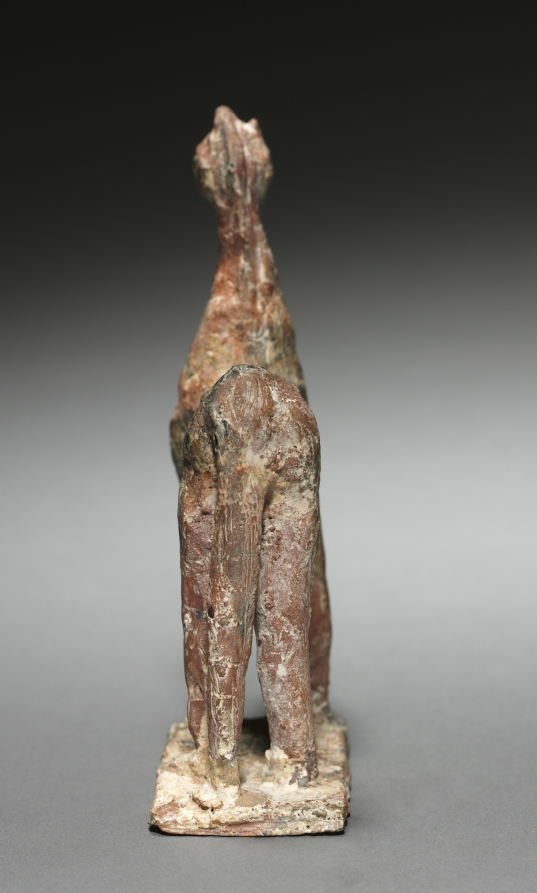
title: Horse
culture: Greece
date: c. 750–725 BCE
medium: terracotta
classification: Sculpture